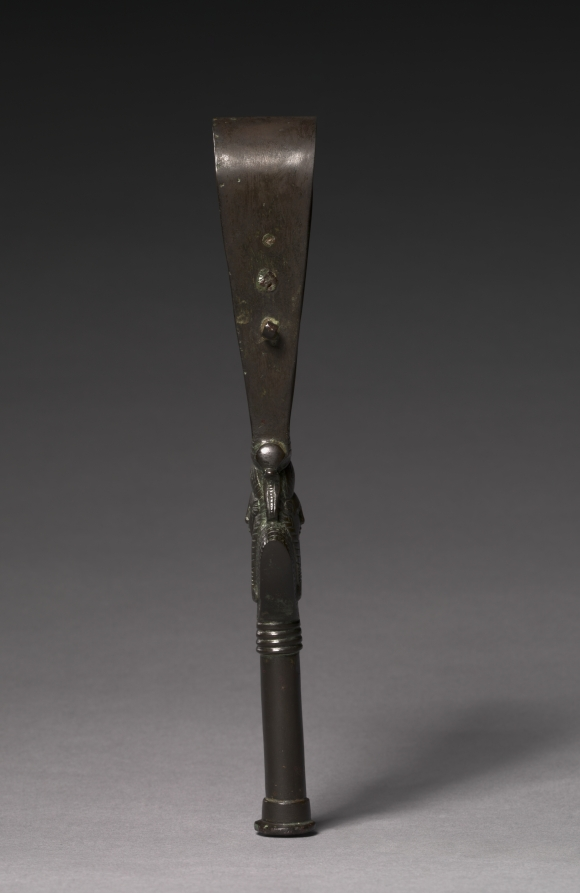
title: Arched Sistrum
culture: Egypt, Late period (715–332 BCE), Dynasty 30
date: 380–343 BCE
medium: bronze, hollow cast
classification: Implements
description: A sistrum is a musical rattle. Metal disks strung on wires along the arched upper end of the sistrum produced a rustling sound that was supposed to have a calming effect on the nerves of various deities, especially the goddesses Hathor and Bastet. Appropriately, this example is decorated with a Hathor head (a woman with cow’s ears) and a cat (the image of Bastet). These instruments are particularly associated with women, who played them as members of a temple choir.